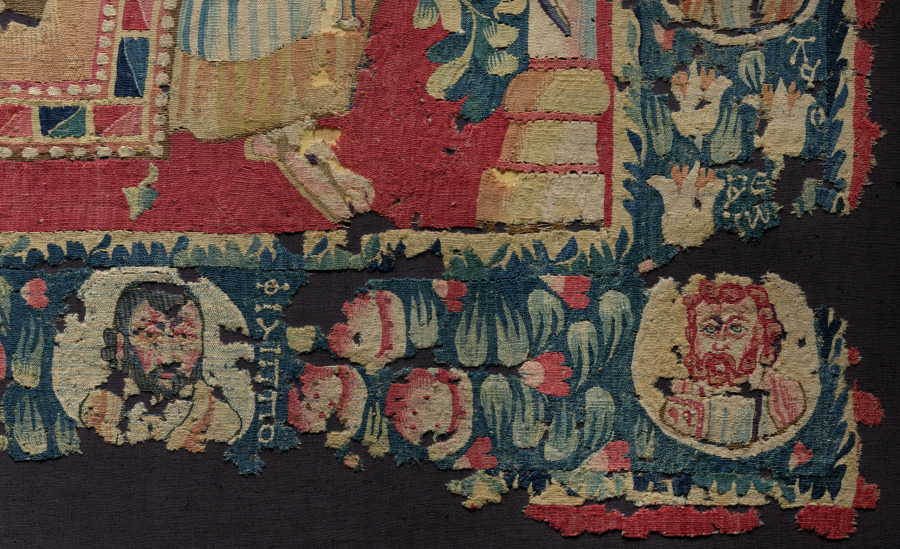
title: Icon of the Virgin and Child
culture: Egypt, Byzantine period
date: 500s CE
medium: wool and dye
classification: Textile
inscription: on the lintel of the architectural setting, the Greek inscription translates as: The Holy Michael, The Holy Mary, The Holy Gabriel. The wide foliate border is decorated with fruits and flowers and, in the lower part, with medallions containing the busts of apostles whose names are inscribed nearby in Greek and are translated as: Andrew, Matthew, Paul the Apostle, Luke, James, Phillip, Mark, Thomas, John, Matthias, Peter, and Bartholomew.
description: Woven from more than 20 colors of woolen thread, this rare tapestry was more expensive than a painting when it was made. The historical price reflected contemporary viewers’ appreciation for the skilled color blending by the weavers. Hung on a wall, this tapestry allowed viewers to venerate (honor) the Virgin Mary and the Christ Child in the Christian Orthodox church. Angels and apostles surround them, their names written in Greek. To be spiritually effective, an icon (devotional image) should follow its subject’s established visual tradition as closely as possible.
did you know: Created in Egypt's hot and dry desert climate, this tapestry features a border of lush greenery and fruits, while flowers peek out from around the throne of the Virgin. Imagine encountering this artistic oasis in a Coptic church during the dry heat of the day.